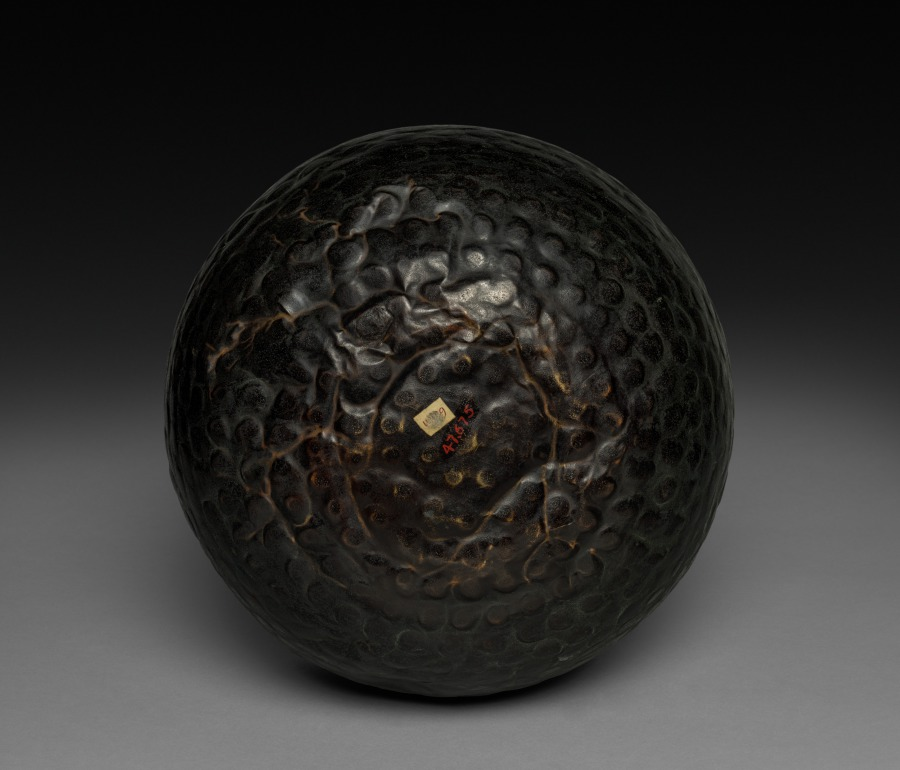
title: Gong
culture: Japan, Edo period (1615–1868)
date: early to mid-1800s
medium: bronze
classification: Metalwork